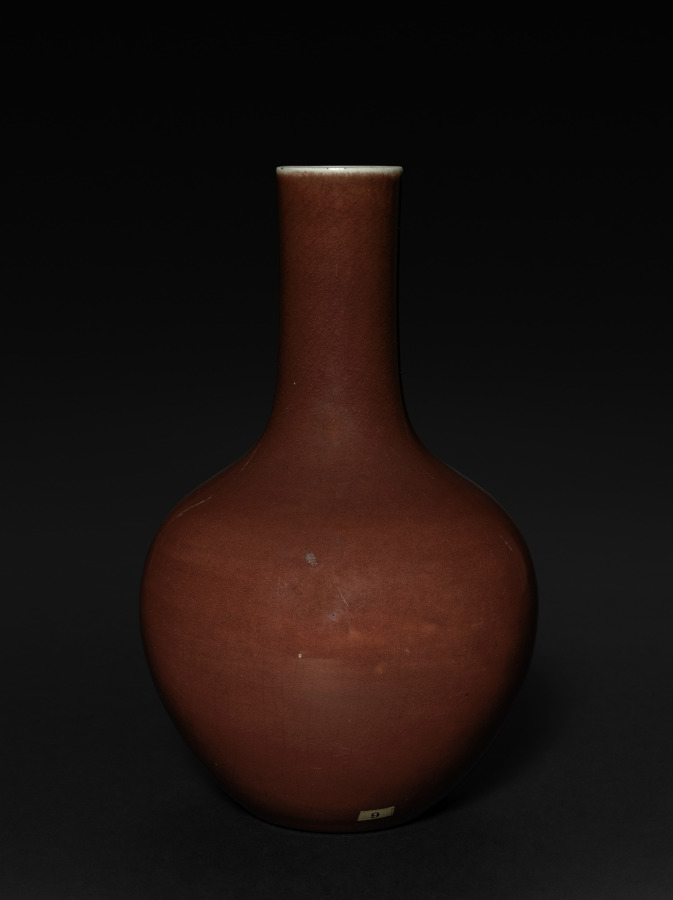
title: Bottle-shaped Vase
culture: China, Qing dynasty (1644–1911), Qianlong reign (1736–95)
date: 1736–95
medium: porcelain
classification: Ceramic